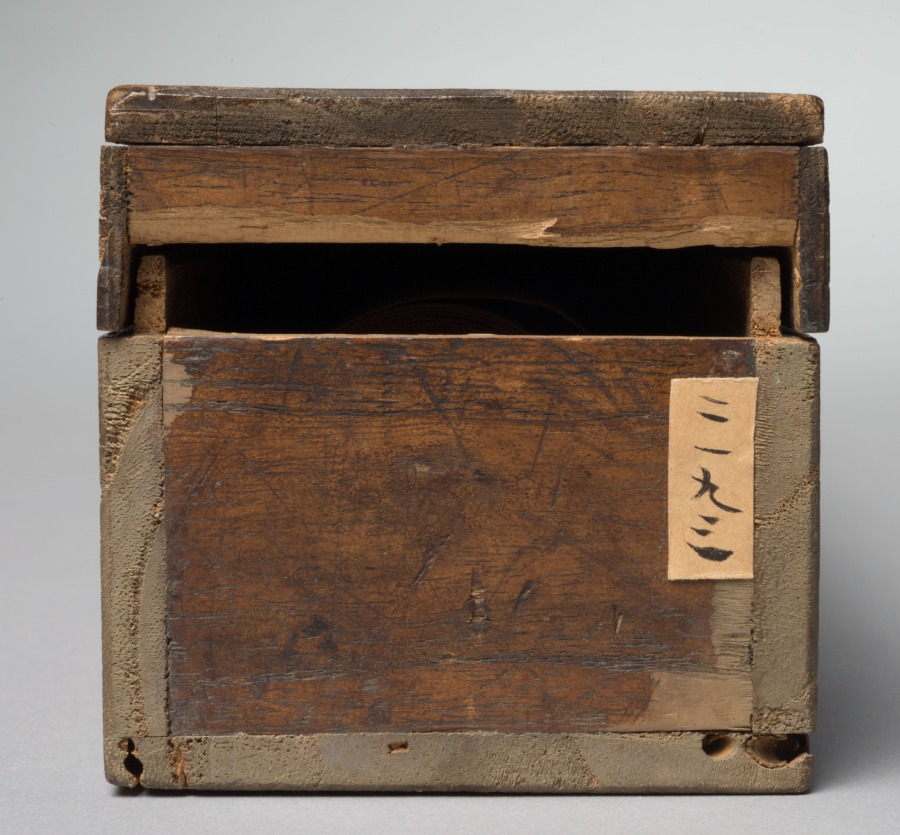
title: Monkey Hanging on to a Branch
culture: Japan, Edo period (1615–1868)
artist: Mori Sosen (Japanese, 1747–1821)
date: 1780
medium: hanging scroll; color on paper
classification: Painting